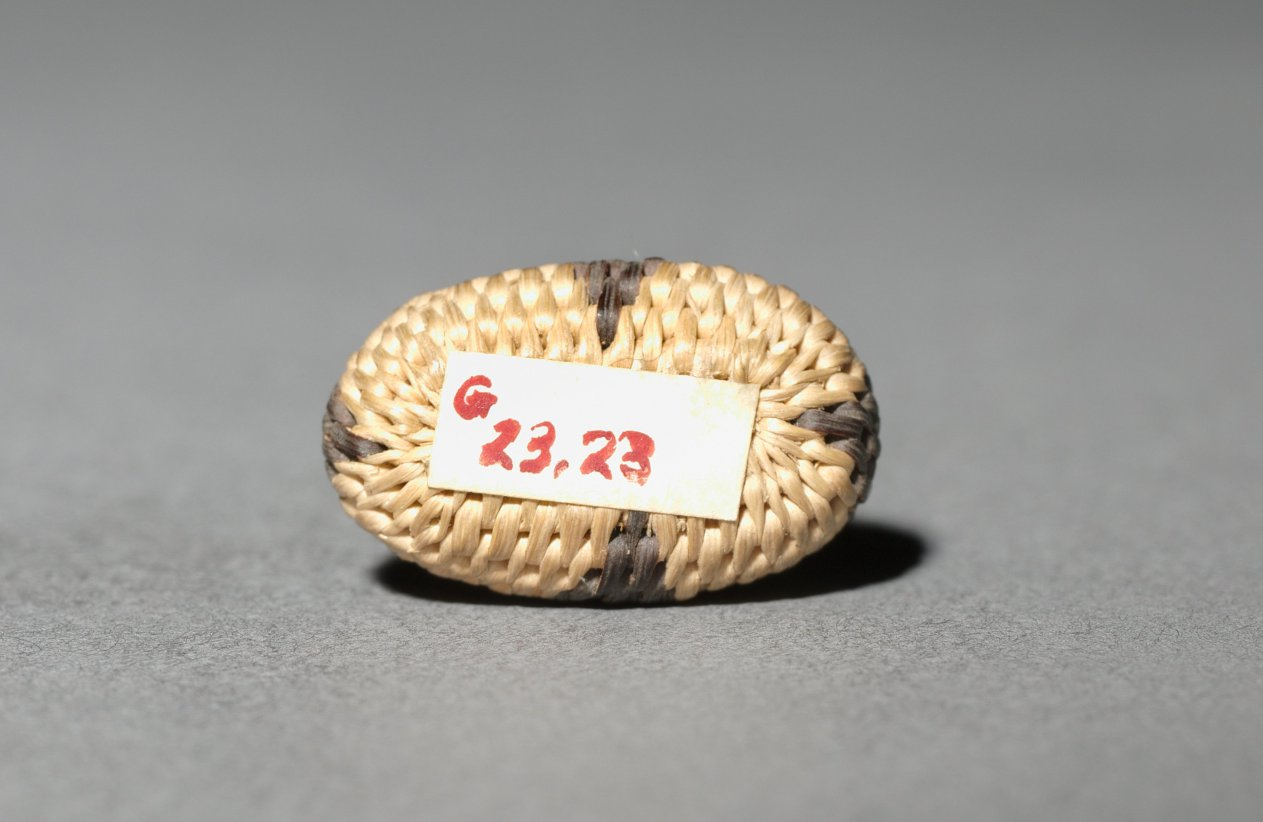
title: Miniature Basket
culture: America, Native North American, Southwest, Arizona, Akimel O'odham (Pima), Unassigned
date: before 1923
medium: plant fiber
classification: Basketry